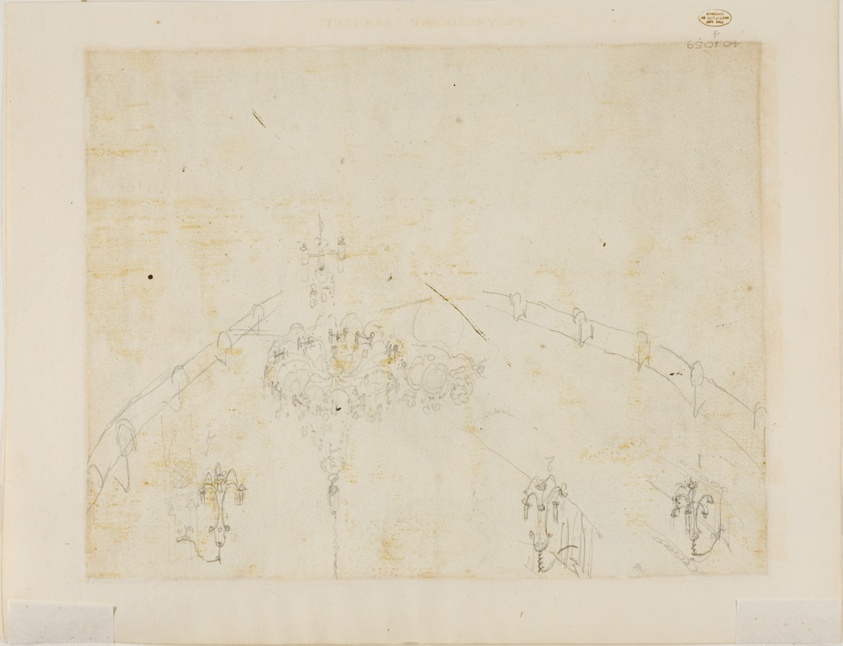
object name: Drawing and Watercolor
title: Study for Astley's Theatre (recto); Study for Crystal Chadeliers in Astley's Amphiteatre (verso)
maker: Augustus Charles Pugin (English, born France, 1762-1832); Thomas Rowlandson (English, 1756-1827)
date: c. 1808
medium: Graphite with pen and brown ink (recto), and graphite (verso), on cream wove paper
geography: England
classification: graphite; drawings (visual works); prints and drawing